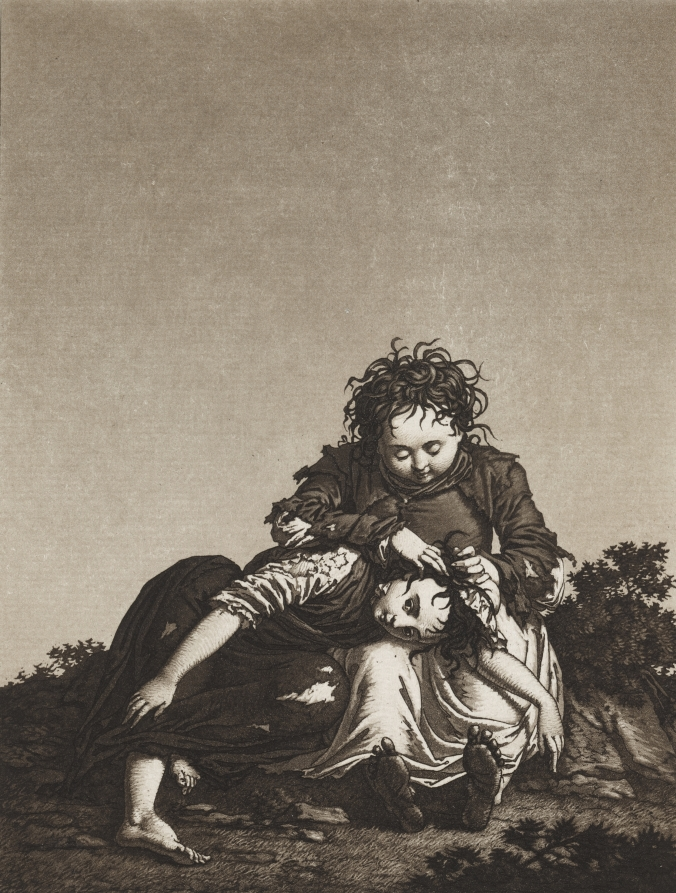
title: The Young Beggars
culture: Germany, late 18th-early 19th century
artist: Karl Ludwig Bernhard Buchhorn (German, 1770–1856)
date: c. 1800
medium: aquatint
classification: Print